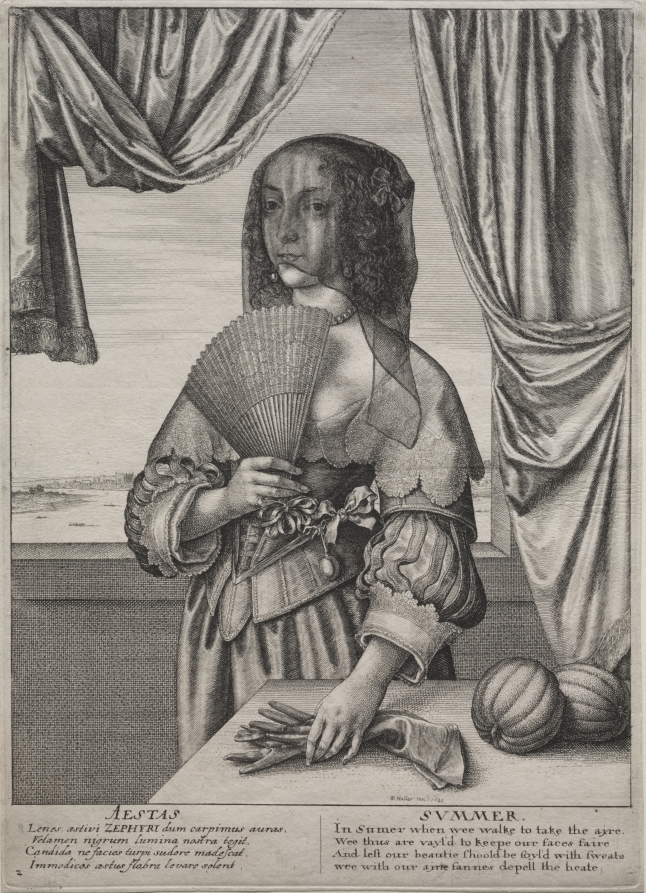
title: The Four Seasons: Summer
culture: Bohemia, 17th century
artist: Wenceslaus Hollar (Bohemian, 1607–1677)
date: 1641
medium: etching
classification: Print